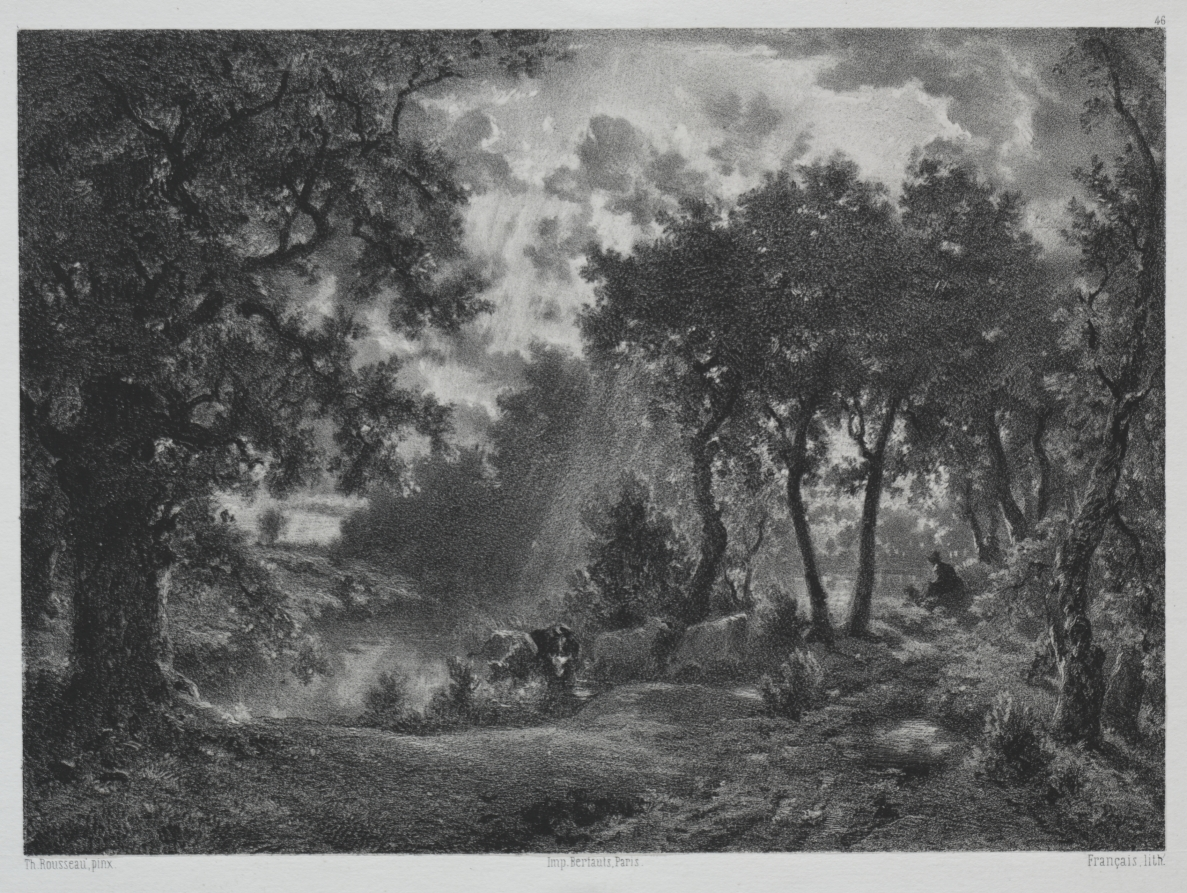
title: After the Shower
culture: France, 19th century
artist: François-Louis Français (French, 1814–1897)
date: c. 1830–1870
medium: lithograph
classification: Print